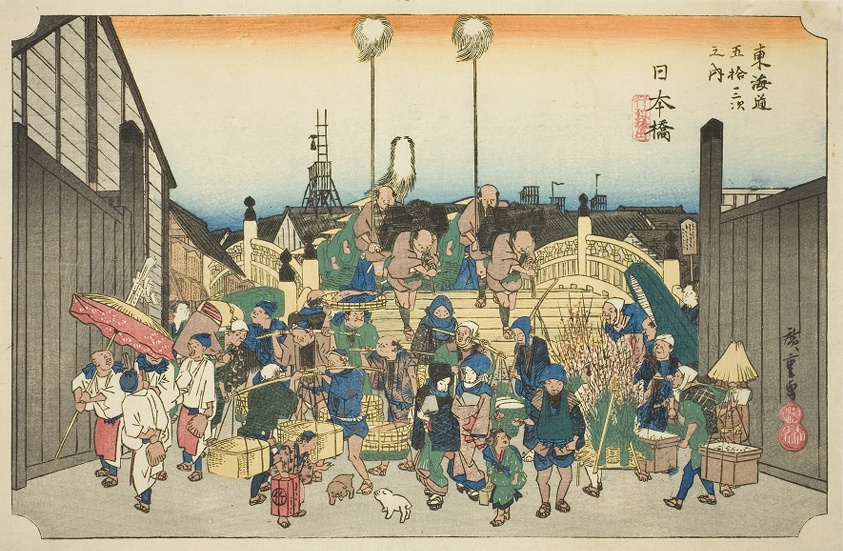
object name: Print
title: Nihonbashi: Procession Departing (Nihonbashi, gyoretsu furidashi), from the series "Fifty-three Stations of the Tokaido Road (Tokaido gojusan tsugi no uchi)," also known as the Hoeido Tokaido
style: Japanese (culture or style)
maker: Utagawa Hiroshige 歌川 広重; Japanese, 1797-1858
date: c. 1833/34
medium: Color woodblock print; oban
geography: Japan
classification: woodblock print; print; asian art